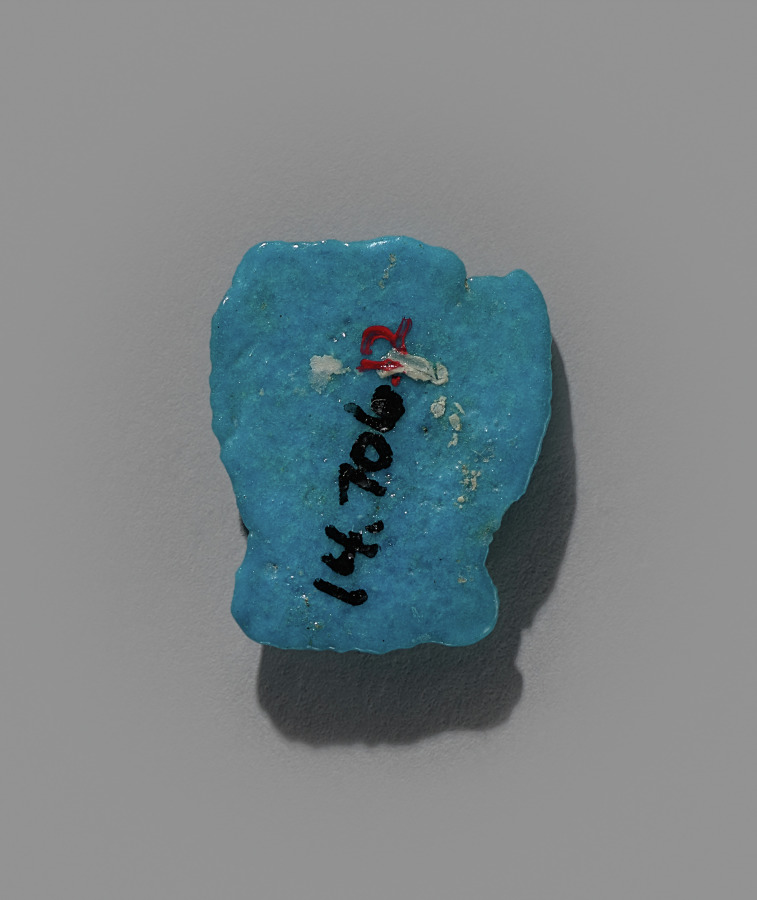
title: Food Model Amulet: Brace of Duck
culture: Egypt, New Kingdom (1540–1069 BCE), Dynasties 19–20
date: 1295–1069 BCE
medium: turquoise faience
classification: Amulets